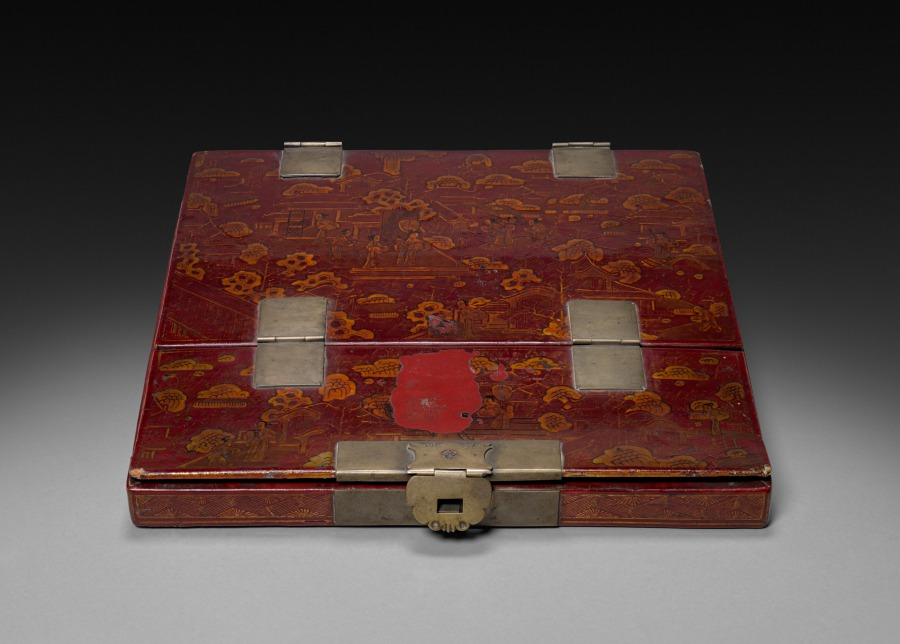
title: Mirror in a Lacquer Case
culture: China, Qing dynasty (1644-1911)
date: c. 1800–1825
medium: lacquered paper; glass mirror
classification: Lacquer